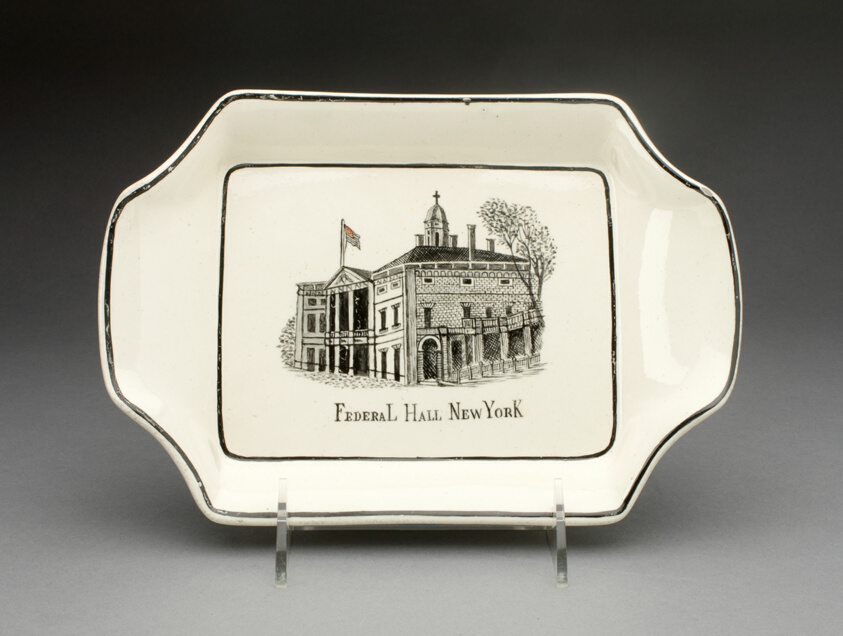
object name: Ceramics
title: Dish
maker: Wedgwood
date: c. 1926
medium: Earthenware with black transfer-print decoration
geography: England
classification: dish (vessel); earthenware; european decorative arts; ceramics